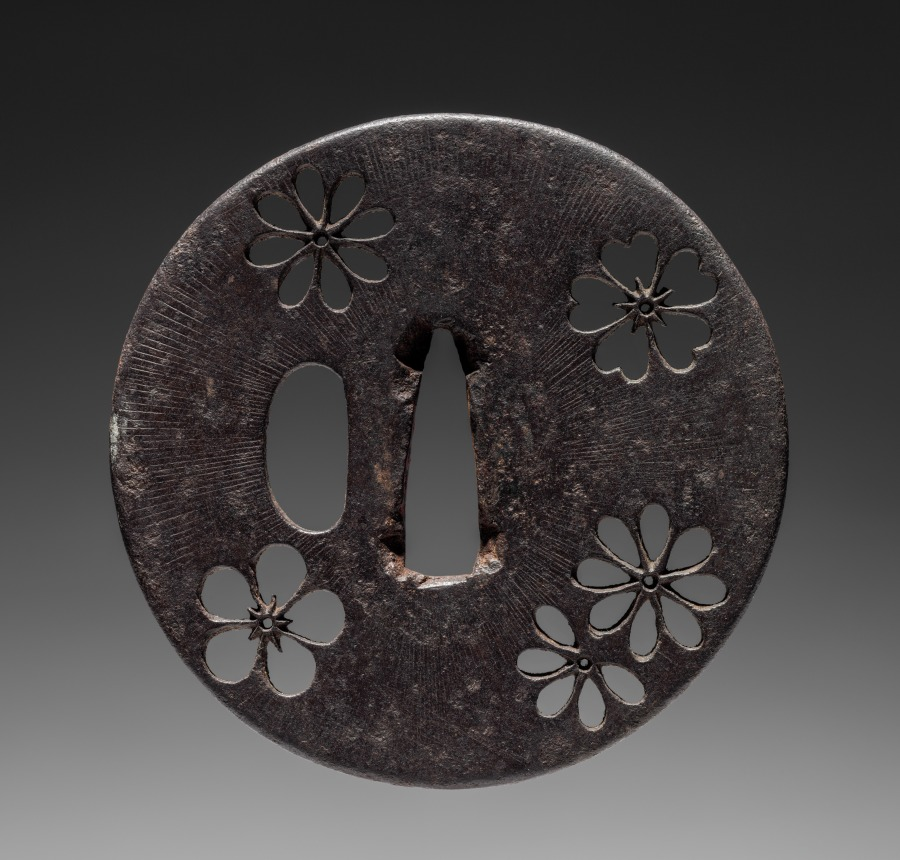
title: Sword Guard (Tsuba)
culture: Japan, possibly Edo period (1615-1868)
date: c. 1615–1868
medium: iron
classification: Arms and Armor